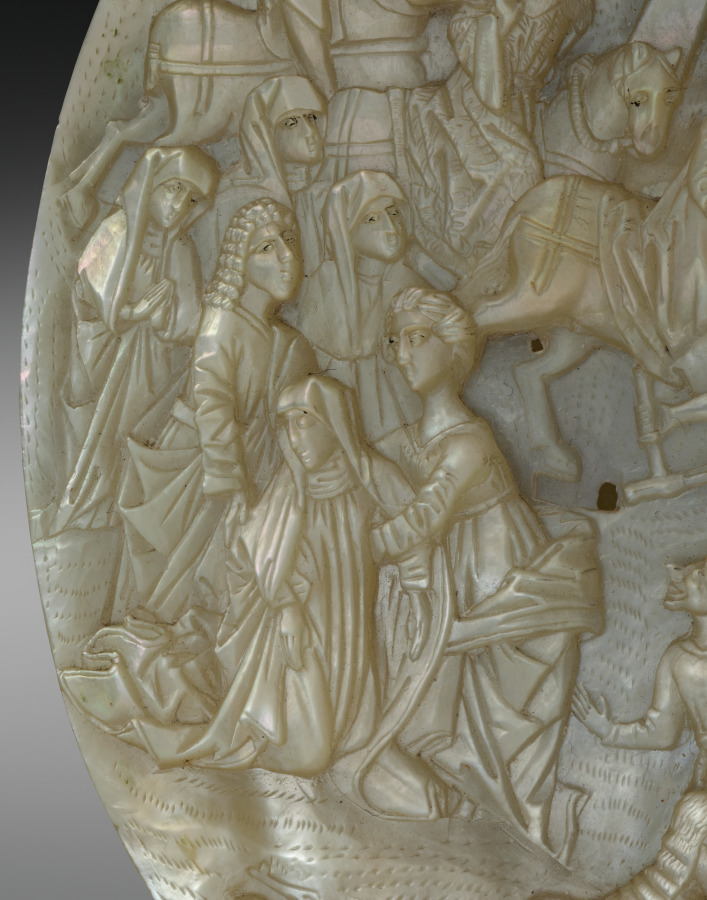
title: Calvary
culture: Germany, Middle Rhine?, 15th century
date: c. 1450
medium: mother-of-pearl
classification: Sculpture